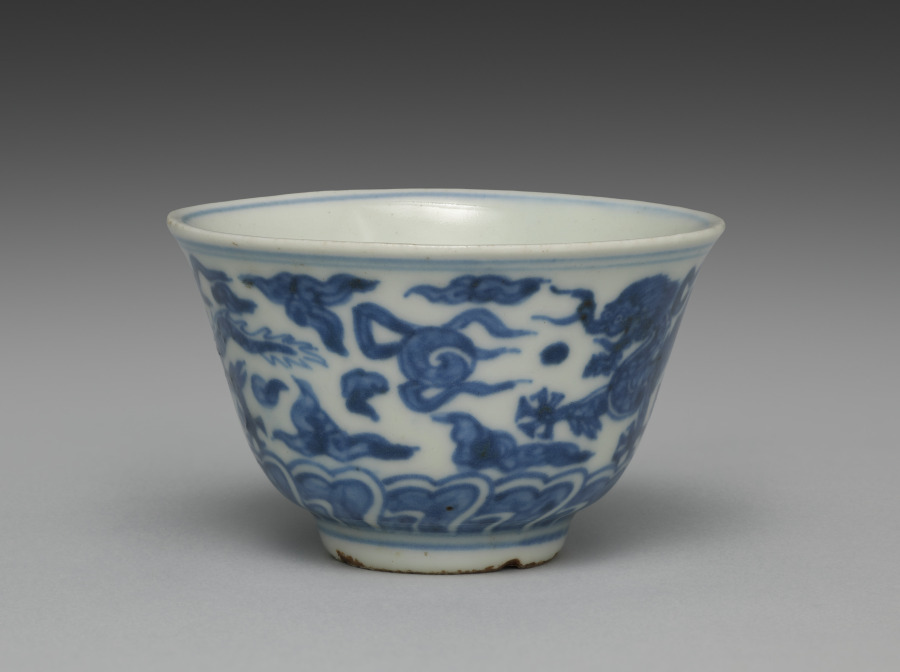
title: Cup from Tea Cups with Dragons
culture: Japan, Edo period (1615–1868)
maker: Seifū Yohei I (Japanese, 1801–1861)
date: 1840s–57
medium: One from a set of five tea cups; porcelain with underglaze blue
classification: Ceramic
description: Seifū Yohei I made both blue and white porcelains after Ming dynasty (1368–1644) Chinese wares fired in the kilns at Jingdezhen for export. He also made colorful stoneware in the style of his teacher, Nin’ami Dōhachi (Takahashi Dōhachi II) (1783–1855).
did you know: A small figure of an elephant serves as the handle for the lid.